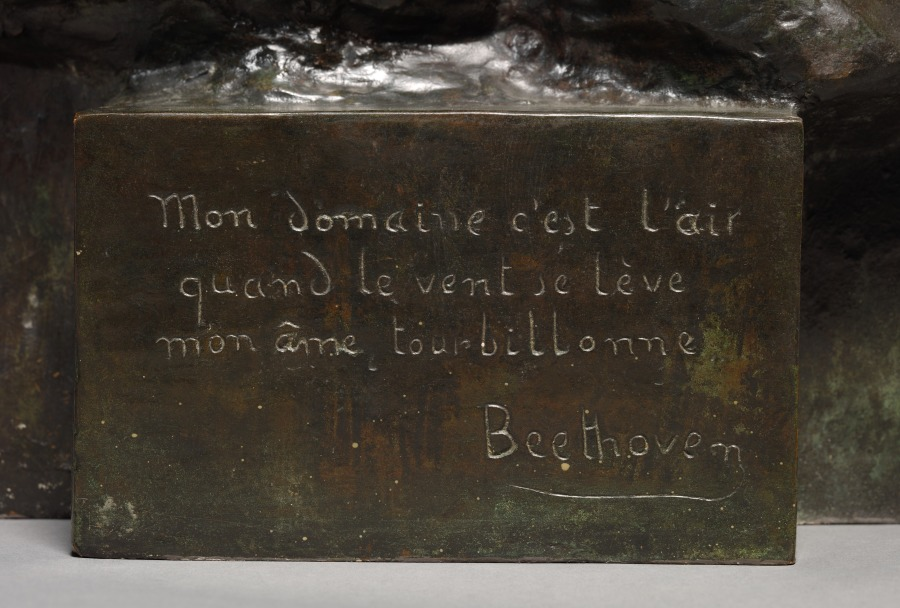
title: Head of Beethoven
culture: France, 19th century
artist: Emile Antoine Bourdelle (French, 1861–1929)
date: 1891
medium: bronze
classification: Sculpture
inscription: Signed left side: "Bourdelle / Sculpt."; inscribed right side: "FONRIENATLE DES BRONZES / J PETERMANN: ST GILLES BRUXELLES"; inscribed on front: "Mon domaine c'est l'air / quand le vent, se leve / mon âme tourbillonne / Beethoven"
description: A pioneer of modern sculpture, Antoine Bourdelle studied at the École des Beaux-Arts in Paris and worked as an assistant to Augustin Rodin, who greatly admired the younger artist’s work. In 1888 Bourdelle produced the first of a series of sculptural portraits of Ludwig van Beethoven, in which the artist orchestrated powerful billowing shapes to convey the creative spirit or genius of the composer. The artist inscribed a quote from Beethoven in the lower left: “My domain is the air; when the wind rises my soul swirls.”